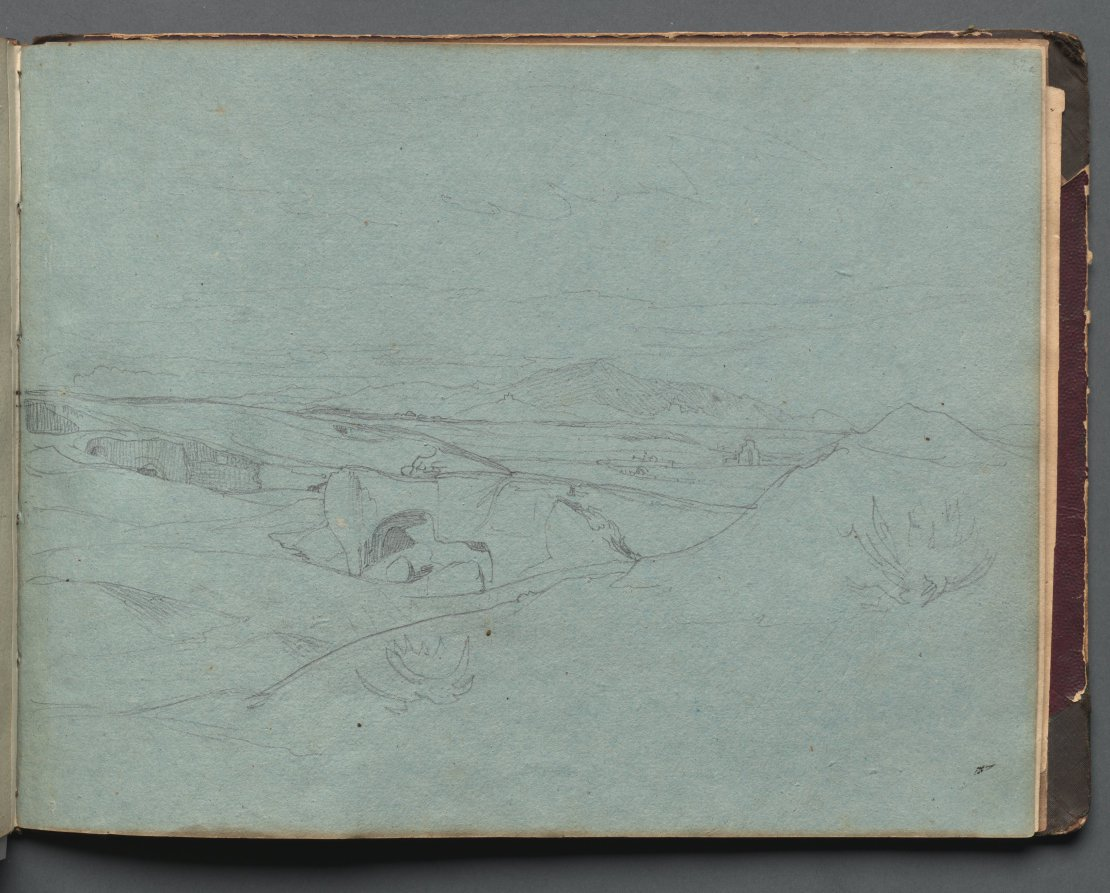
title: Album with Views of Rome and Surroundings, Landscape Studies, page 52a: Roman Landscape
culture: Germany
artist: Franz Johann Heinrich Nadorp (German, 1794–1876)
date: c. 1830s-70s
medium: graphite on blue paper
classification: Bound Volume